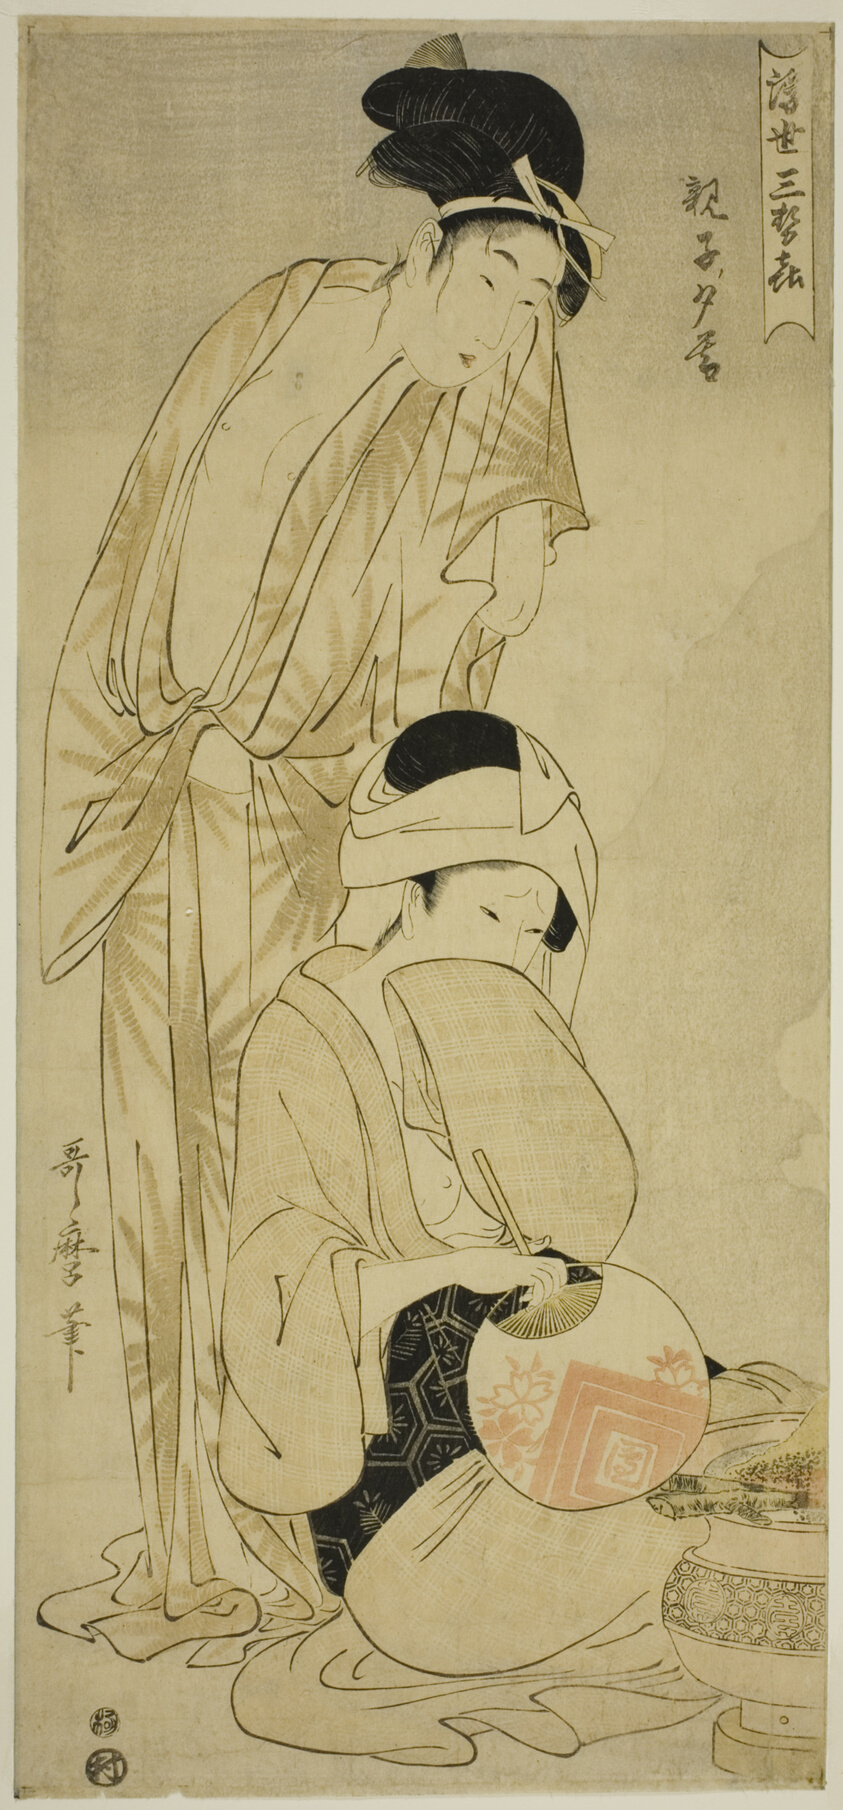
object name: Print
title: Mother and Child at Dusk (Oyako yugure), from the series "Three Evening Pleasure of the Floating World (Ukiyo san seki)"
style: Japanese (culture or style)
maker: Kitagawa Utamaro 喜多川 歌麿; Japanese, 1753 (?)-1806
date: c. 1800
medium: Color woodblock print; naga-oban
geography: Japan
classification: woodblock print; print; asian art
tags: mothers, parents